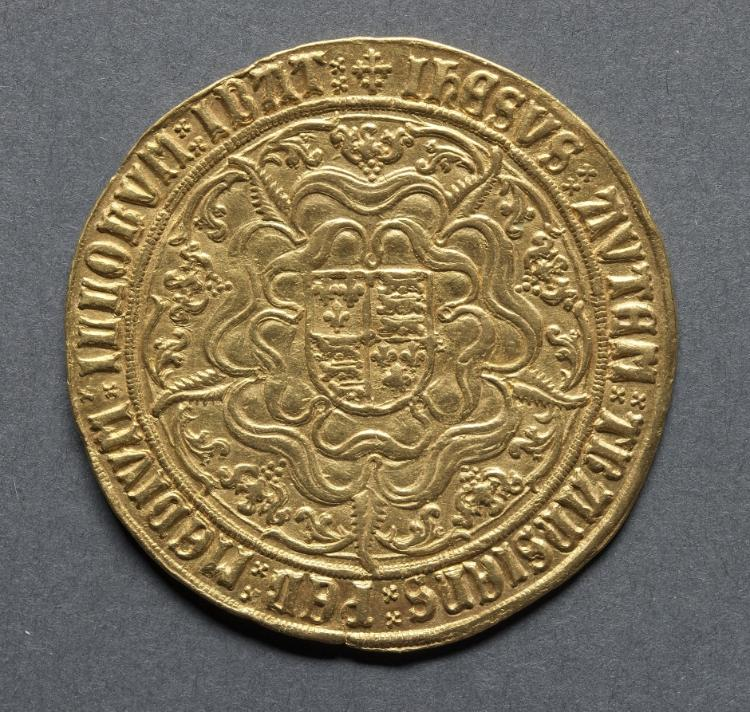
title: Sovereign: Shield of Arms in Tudor Rose (reverse)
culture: England, Henry VII, 1485-1509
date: 1504–1509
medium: gold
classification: Coins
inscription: IHESUS AVTEM TRANSIENS PER MEDIUM ILLORVM IBAT